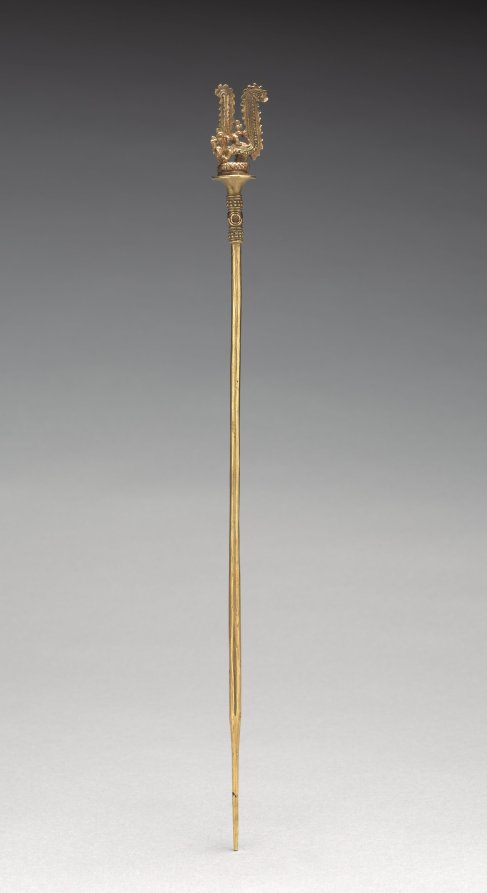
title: Lime Dipper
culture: Colombia, Calima region, Yotoco style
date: c. 1–800 CE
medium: gold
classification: Metalwork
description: Coca-leaf chewing was a widespread ritual in ancient South America. Utensils included a container and a dipper or spoon for powdered lime (made from seashells), added to the coca to enhance its gentle, stimulating effect. Colombian cultures are especially known for transforming these utensils into works of art made of precious metal. The image on the tallest dipper is wonderfully complex. A serpent coils at the bottom, beneath a snarling animal with a huge, vertical tail. This animal has a tiny monkey on its back; the monkey also has a huge tail, which rests on the first animal's head like a headdress. This intricate image was created with the lost-wax casting process.